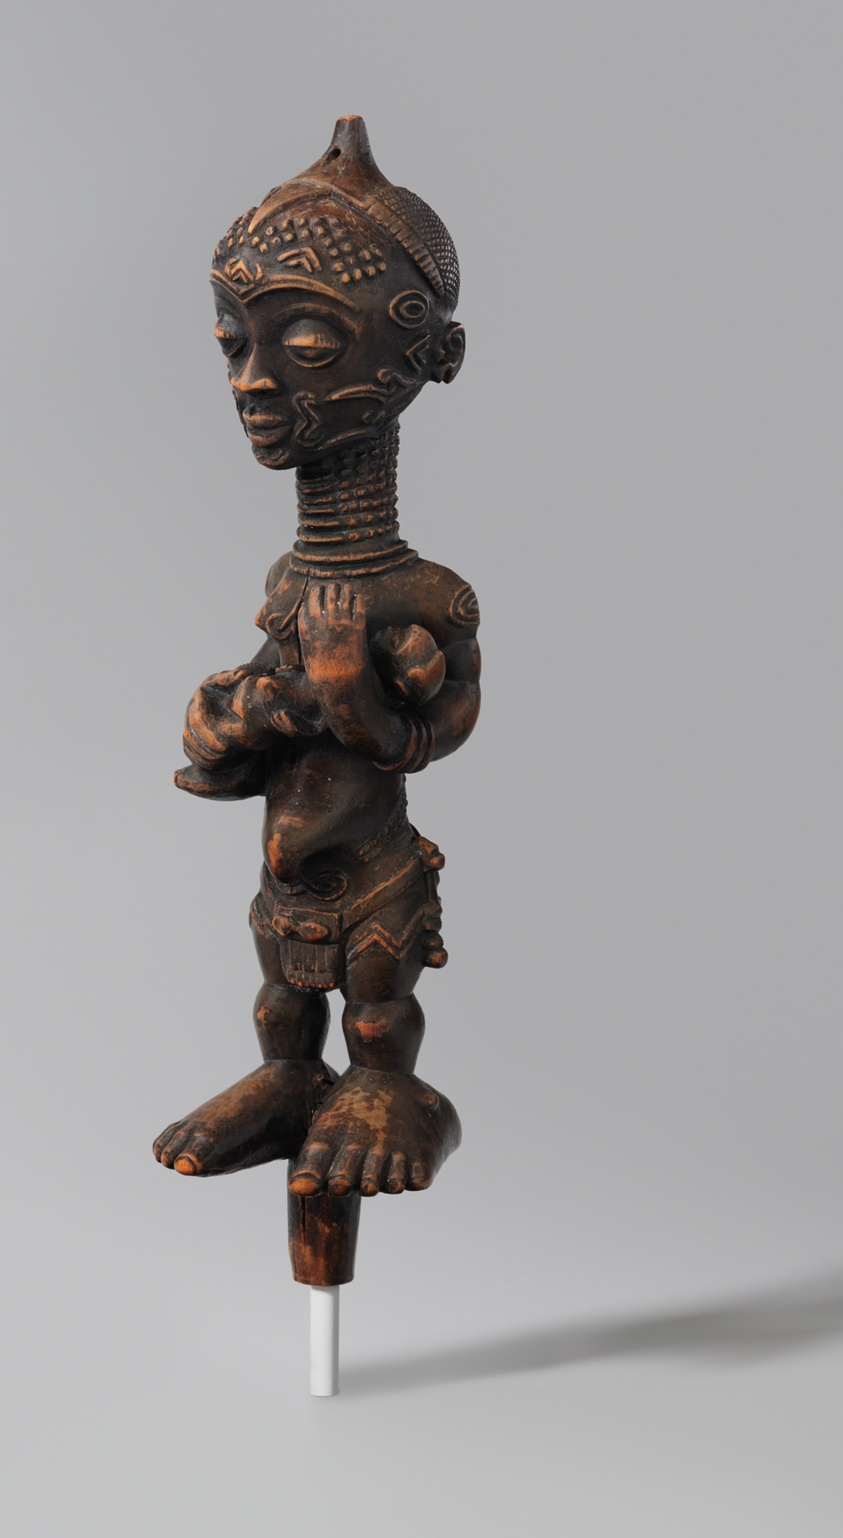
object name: Sculpture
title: Mother-and-Child Figure (Bwanga bwa Chibola)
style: luluwa, Arts of Africa, lulua, african Art, Central Africa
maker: Luluwa; Democratic Republic of the Congo; Central Africa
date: Mid–late 19th century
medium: Wood and pigment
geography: Democratic Republic of the Congo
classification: sculpture; wood; arts of Africa; african art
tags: children, mothers, containers, status, beauty, female, fertility, goodness, ritual, birth